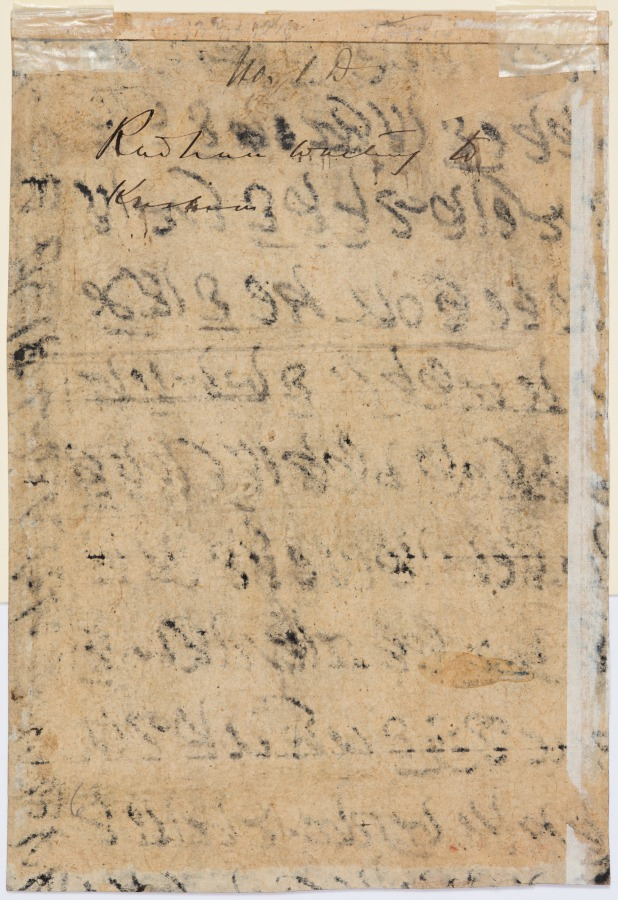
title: A Nayika, probably Proshitaperyasi Nayika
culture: Northern India, Pahari kingdoms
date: c. 1740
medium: Gum tempera on paper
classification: Painting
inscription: Verso: (in English) No. 1 D Radha waiting to Krishna